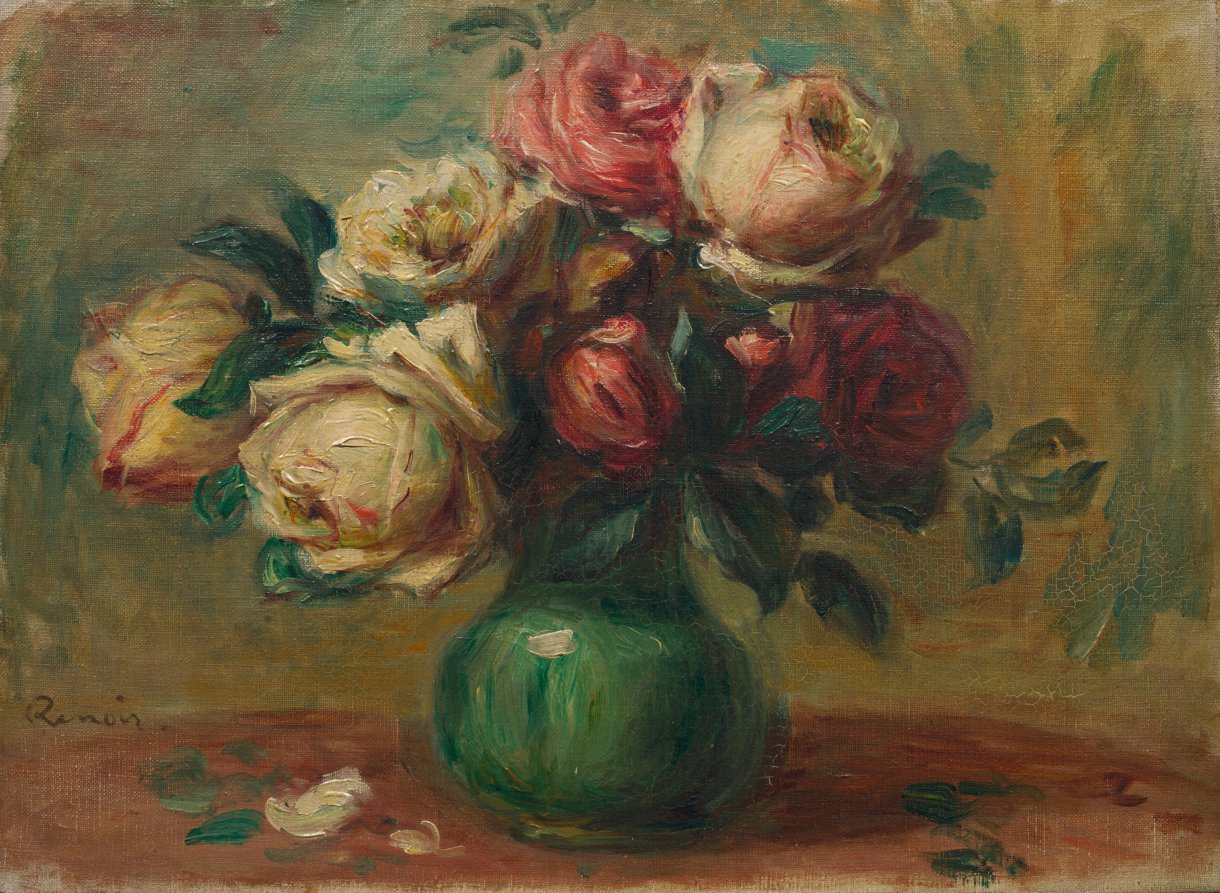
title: Roses in a Vase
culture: France, 19th century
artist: Pierre-Auguste Renoir (French, 1841–1919)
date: c. 1890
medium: oil on fabric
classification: Painting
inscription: Signed lower left: Renoir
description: The palette Renoir used to depict the seven roses in this still life ranges from various shades of red to warm whites, light yellows, and pinks. The artist declared, "'Painting flowers lets my brain rest. It does not cause the same tension of spirit as when I face a model. When I paint flowers, I put down tones, I boldly try values, without having to worry about losing a canvas.'" He was particularly fond of roses, whose full, rounded shapes he likened to the female body. In 1861, Renoir met Claude Monet (1840–1926) and later shared a studio with him. Monet became an important influence on Renoir's art, as can be seen here in the rapid brush strokes, thinly scuffled background, and buildup of paint (impasto) in the blooms.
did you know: Renoir was an excellent singer who wanted to be a musician, but for financial reasons left school at age thirteen to work as an apprentice painter in a porcelain factory.